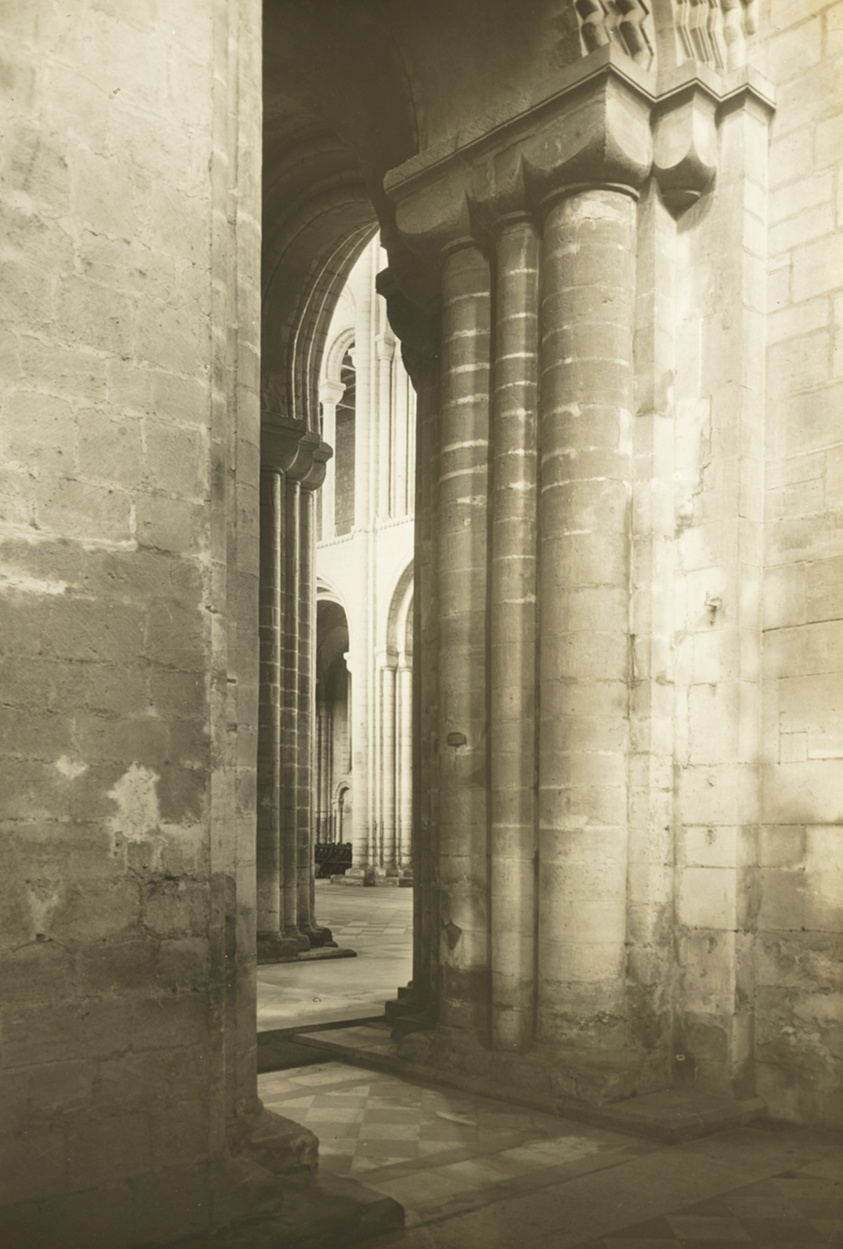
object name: Photograph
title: Ely Cathedral: Southwest Transept into Nave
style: Pictorialism, 19th century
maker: Frederick H. Evans (English, 1853–1943)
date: c. 1891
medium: Lantern slide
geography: England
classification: photograph; photography